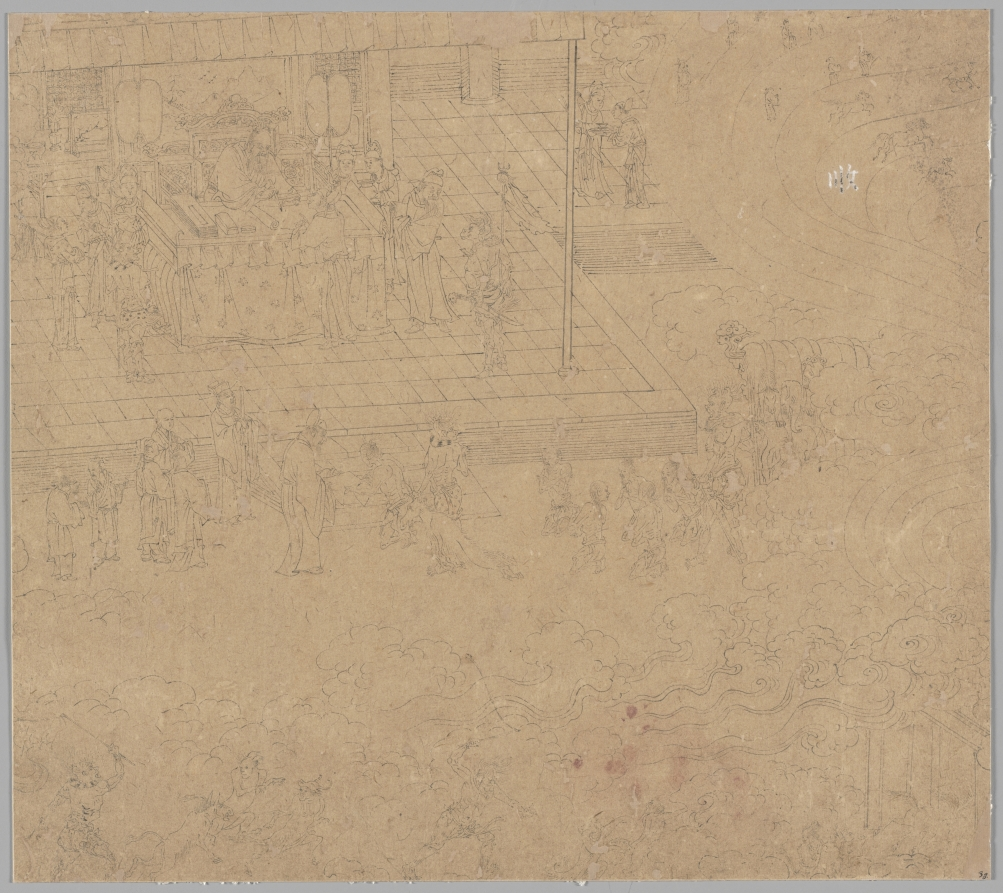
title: Album of Daoist and Buddhist Themes: Kings of Hells: Leaf 38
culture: China, Southern Song dynasty (1127-1279)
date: 1200s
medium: Album, ink on paper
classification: Painting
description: This extraordinary album has 50 paintings on a variety of religious subjects. They were likely created by several master craftsmen to share with studio apprentices as models for fulfilling commissions. The Jade Emperor and the Daoist pantheon make up the first 26 leaves. The next 14 leaves portray the Buddhist Ten Kings of Hell administering punishments to the dead. The third section, called “Clearing the Mountains,” features divine soldiers, led presumably by the deity Erlang Shen 二郎神, fighting undesirable creatures.